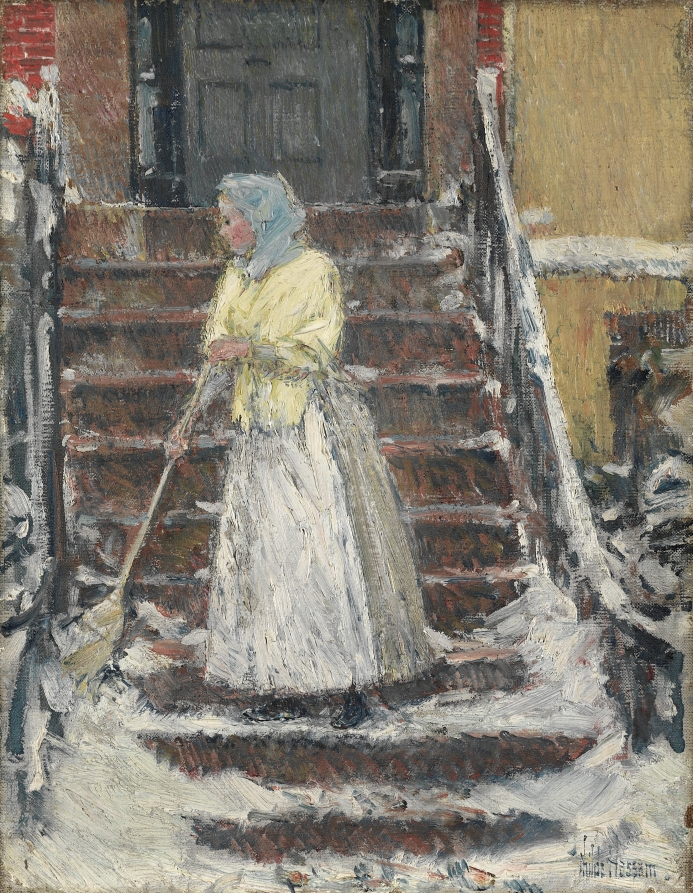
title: Sweeping Snow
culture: America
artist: Childe Hassam (American, 1859–1935)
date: 1890s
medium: oil on canvas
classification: Painting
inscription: signed lower right: Childe Hassam